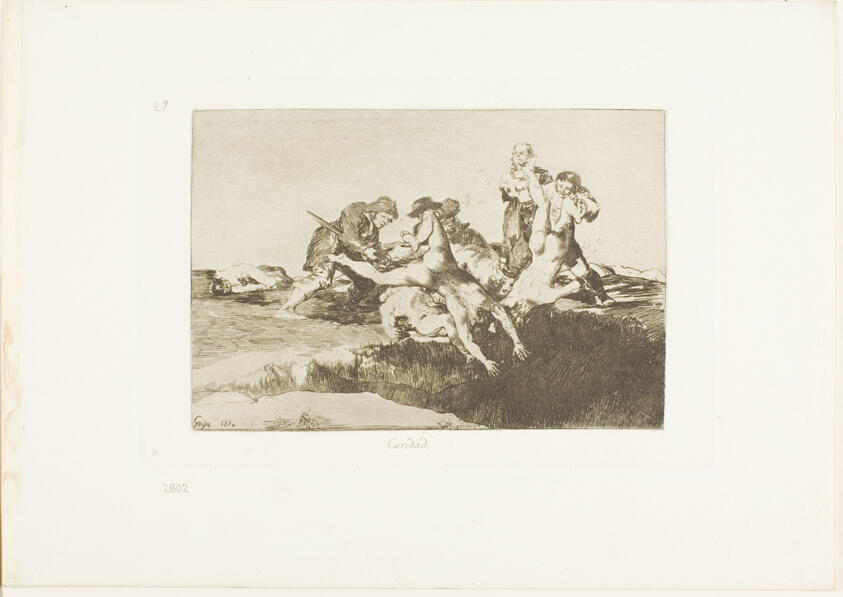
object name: Print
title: Charity, plate 27 from The Disasters of War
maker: Francisco José de Goya y Lucientes (Spanish, 1746-1828)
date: 1810, published 1863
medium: Etching, lavis, drypoint, burnishing and burin on ivory wove paper with gilt edges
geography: Spain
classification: etching; print; prints and drawing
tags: war